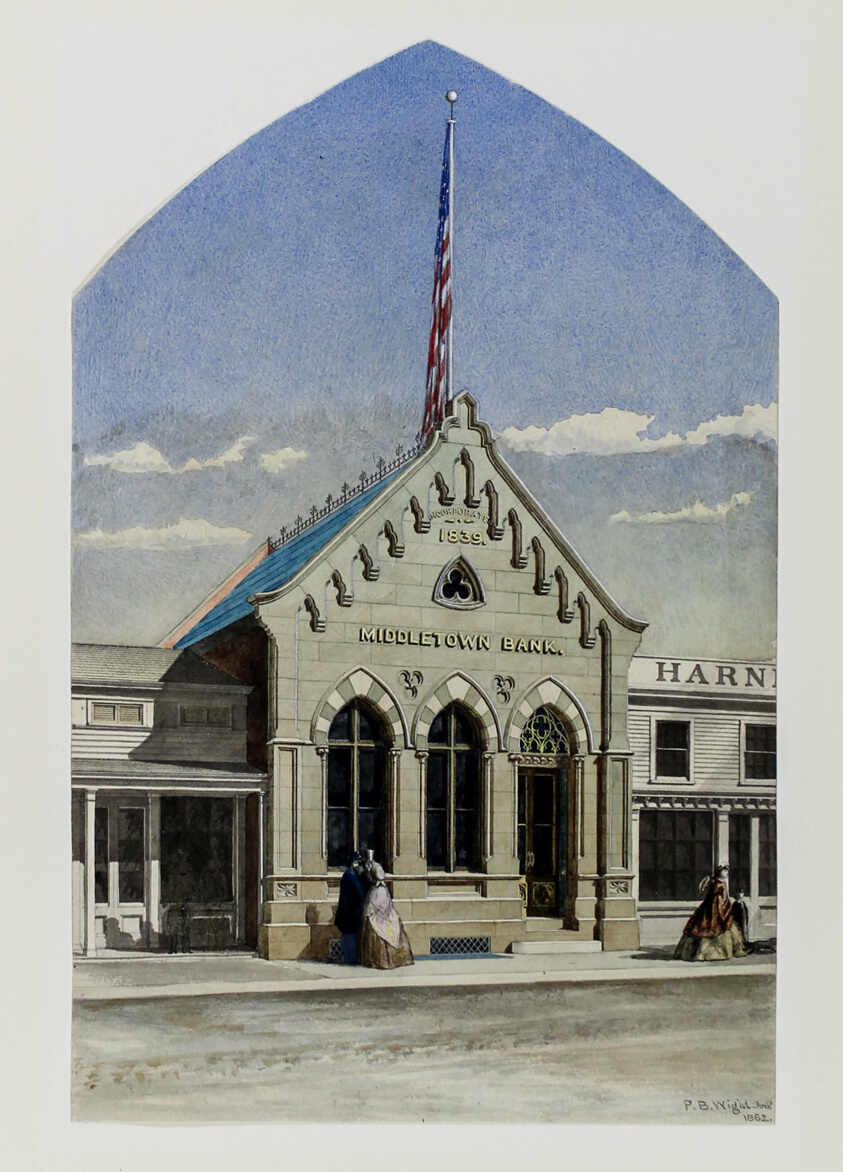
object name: Architectural Drawing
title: Middletown Bank, New York, Perspective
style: 19th century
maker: Peter Bonnett Wight (American, 1838–1925)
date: 1862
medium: Watercolor and gouache over graphite on paper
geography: Middletown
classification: architectural drawing; presentation drawing; architecture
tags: urban planning, architecture, New York